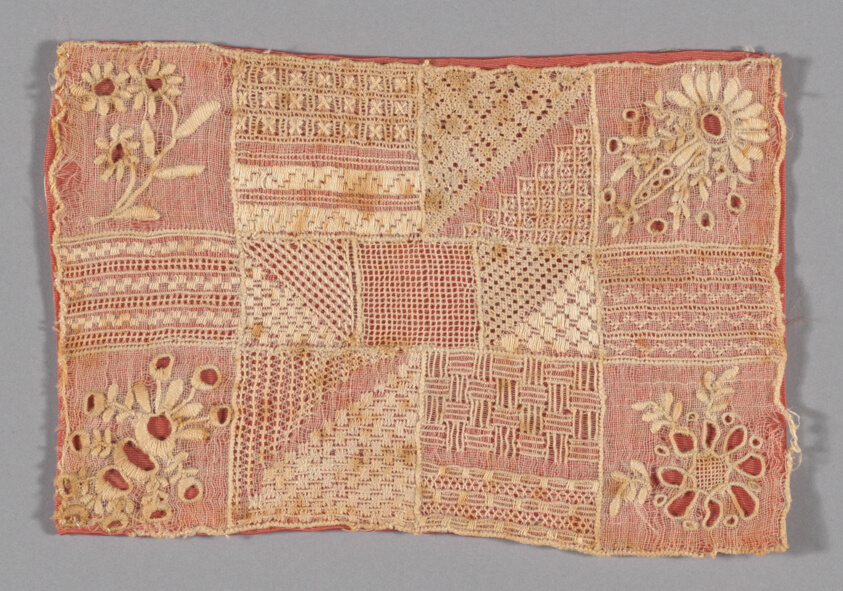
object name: Textile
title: Fragment (From a Sampler)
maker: Charlotte M. Berge (Swedish, active c. 1821); Sweden, Fort Carlsberg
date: 1821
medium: Cotton, plain weave; cut and drawn work in back, cross, crossed back, double hem, Greek cross filling, honeycomb filling, interlocking lace, overcast, satin, and twisted buttonhole stitches; embroidered in overcast and padded satin stitches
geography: Sweden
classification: textile; needlework (visual works)